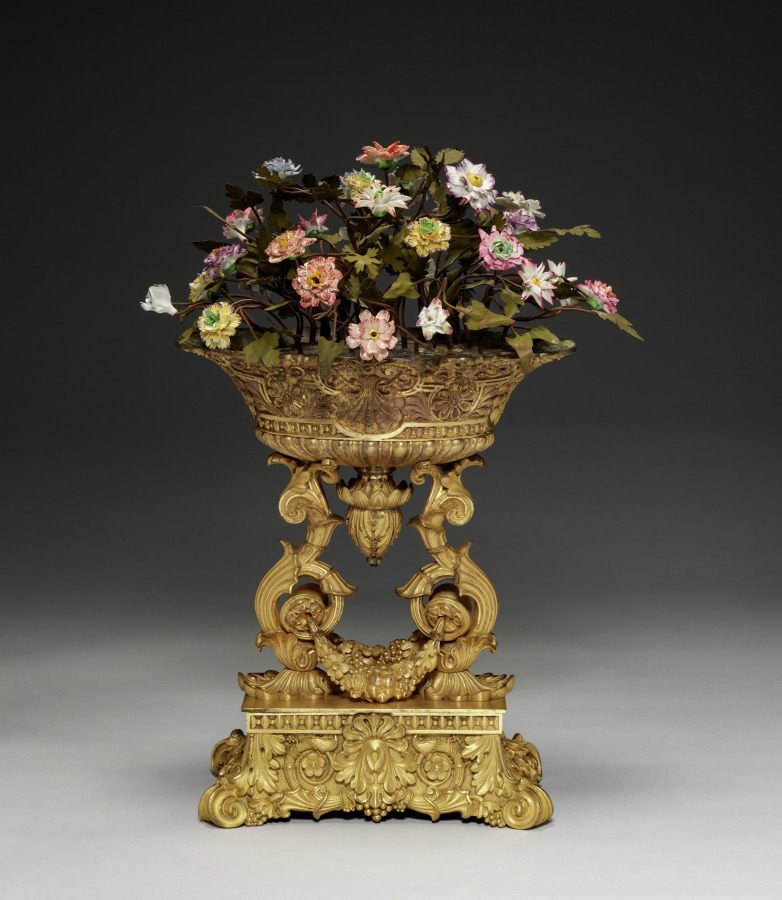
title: Centerpiece, or Jardinière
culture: France, Paris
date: c. 1830–1850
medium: gilt bronze with enamel flowers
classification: Metalwork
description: Regrettably, a maker's mark does not appear on this piece: thus the factory that made it remains unknown. Nevertheless, its design, castings, and gilding are of fine quality and indicate that it is the product of a group of talented craftsmen who worked in the robust taste of the second quarter of the 19th century.